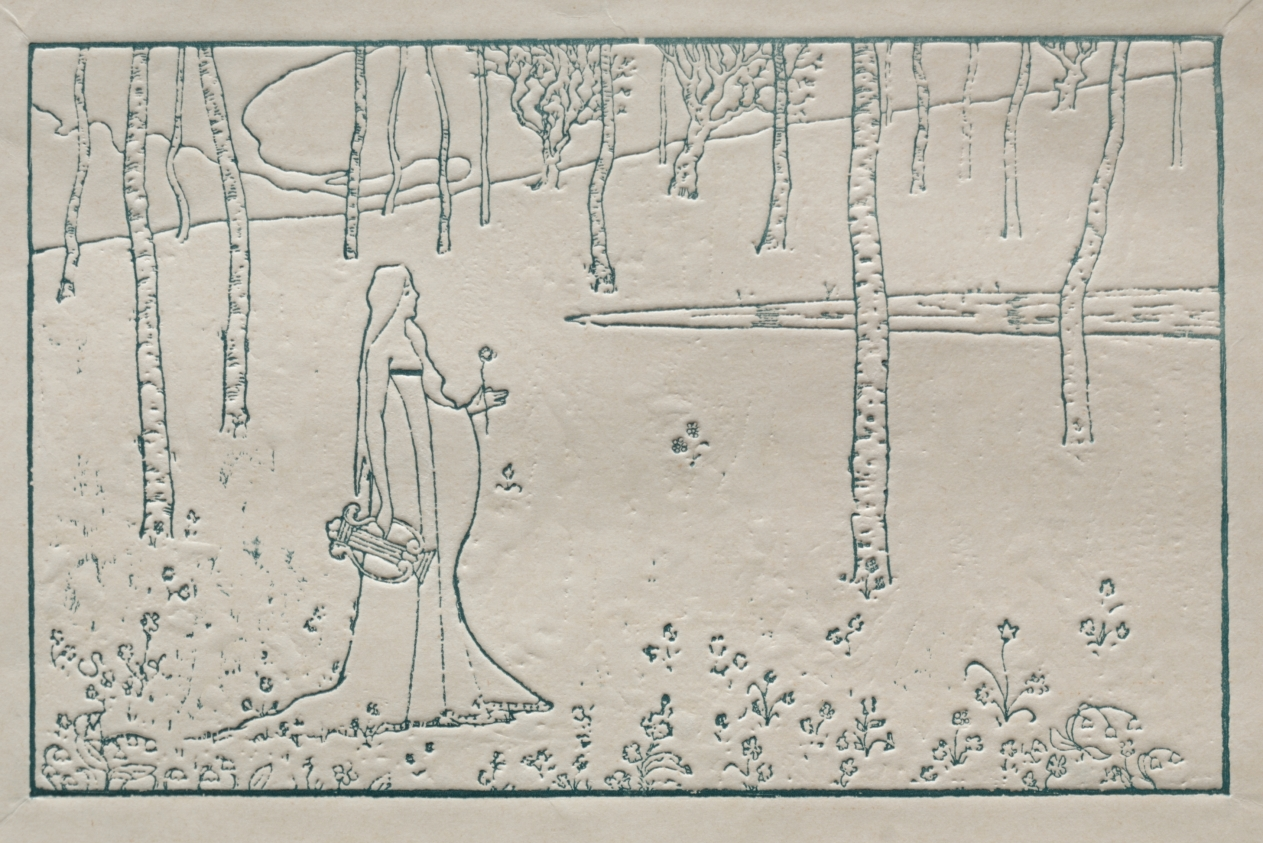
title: Sappho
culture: France, 19th century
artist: Maurice Dumont (French, 1870–1899)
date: 1895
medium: gypsograph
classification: Print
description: Dumont was an innovative printmaker who experimented with a variety of printmaking processes. Sappho-which depicts the ancient Greek poetess with a lyre in a grove of birch trees-appeared in Pan, an artistic journal, accompanied by an article about the gypsograph technique (see glossary). Dumont made several versions of Sappho, which is not surprising since he also wrote poetry.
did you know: Maurice Dumont was one of the most prolific practitioners of gypsography, a printmaking technique that resulted in an embossed impression.